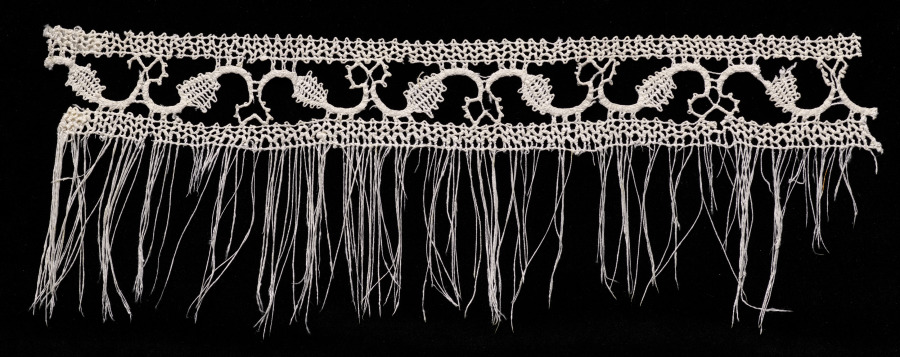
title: Lace Insertion with Fringe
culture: Italy, Venice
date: 1600–1640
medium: Linen: bobbin lace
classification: Lace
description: Although this fringed bobbin lace fragment is made of linen, its format is like those for laces made of gold, silver, and colored silk threads.